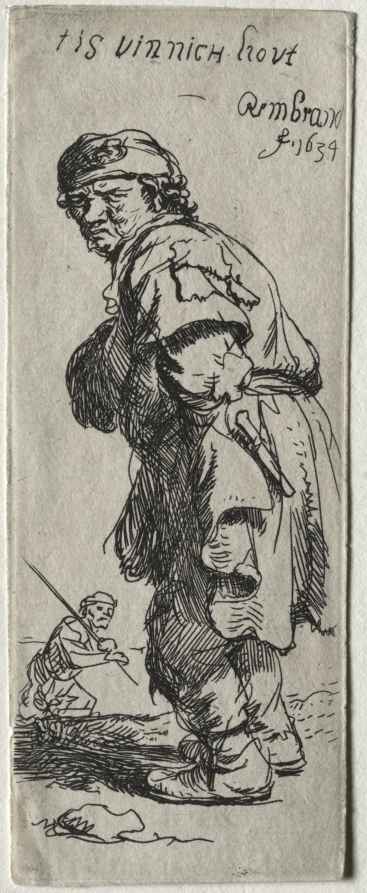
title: A Peasant Calling Out: "it's very cold"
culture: Netherlands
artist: Rembrandt van Rijn (Dutch, 1606–1669)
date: 1634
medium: etching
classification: Print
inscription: across top, in plate: tis vinnich hovt / Rembrand / f·1634 ; VERSO, lower left, in graphite: 134 ; lower left, in graphite: 280 ; lower left, in graphite: a61150 ; lower left, in graphite: 256 ; lower center, in graphite: V71 ; lower center, in graphite: 177[partially erased] ; lower right, in graphite: H.114 ; lower right, in graphite: 177[partially erased]